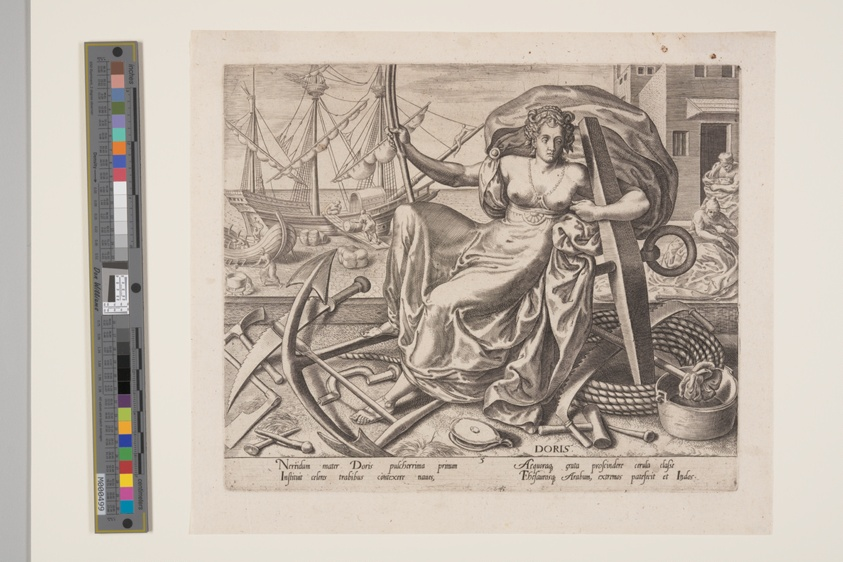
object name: Print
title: Doris, from The Occupations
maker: Philip Galle; Flemish, 1537–1612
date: 1574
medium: Engraving on ivory laid paper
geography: Flanders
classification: engraving; paper; print; prints and drawing